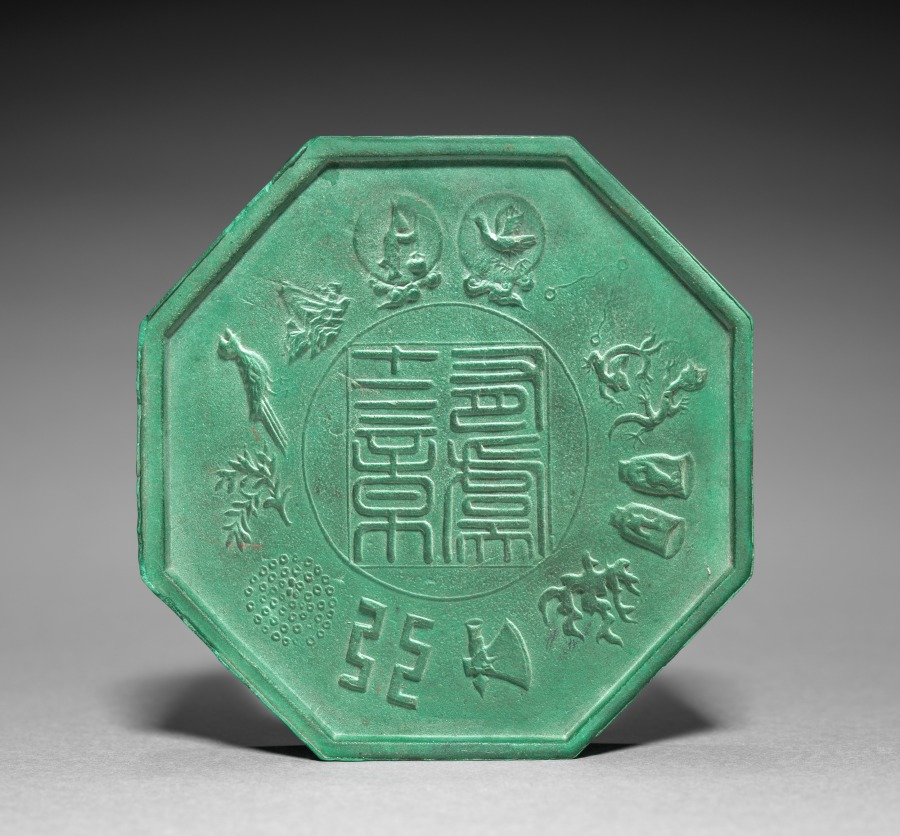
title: Octagonal Ink Cake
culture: China, Ming dynasty (1368–1644)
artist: attributed to Cheng Junfang (Chinese, active c. 1570-c. 1624)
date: 1622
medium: green ink cake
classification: Miscellaneous